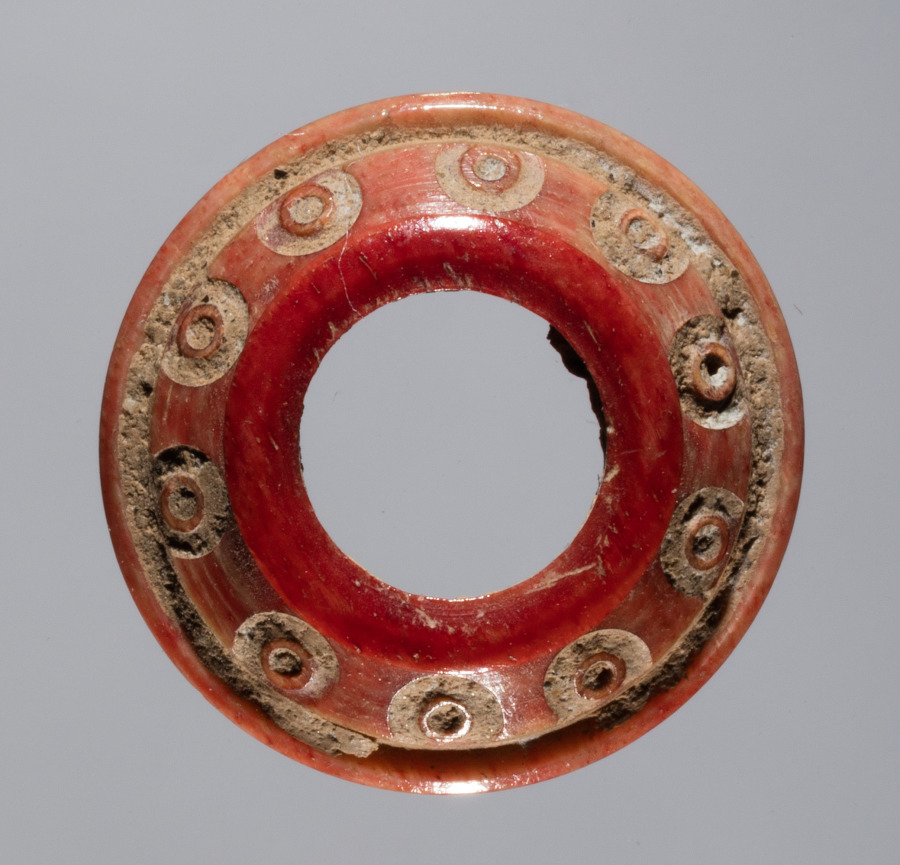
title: Spindle Whorl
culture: Iran, early Islamic period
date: 700s - 900s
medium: bone, incised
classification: Spindle Whorl